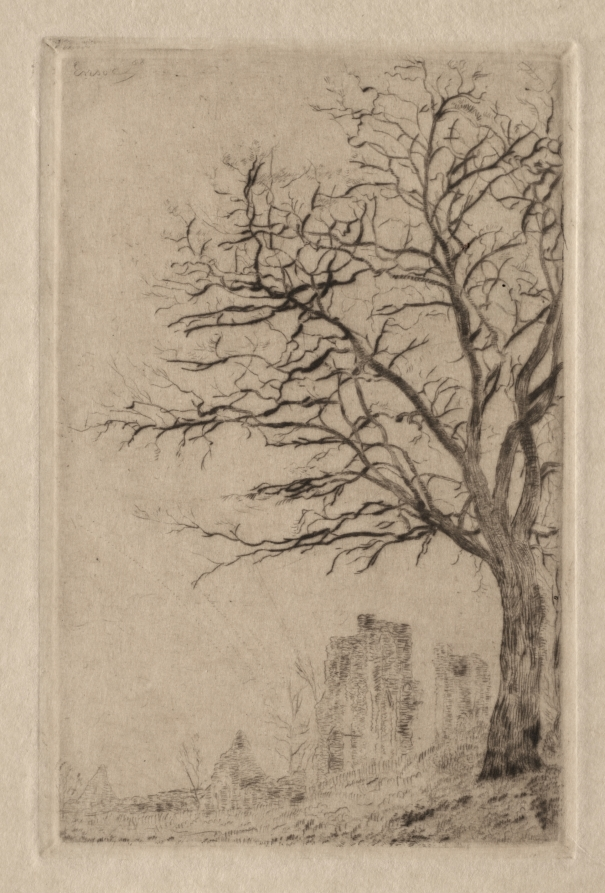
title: Acacia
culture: Belgium, 19th century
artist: James Ensor (Belgian, 1860–1949)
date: 1888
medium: drypoint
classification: Print